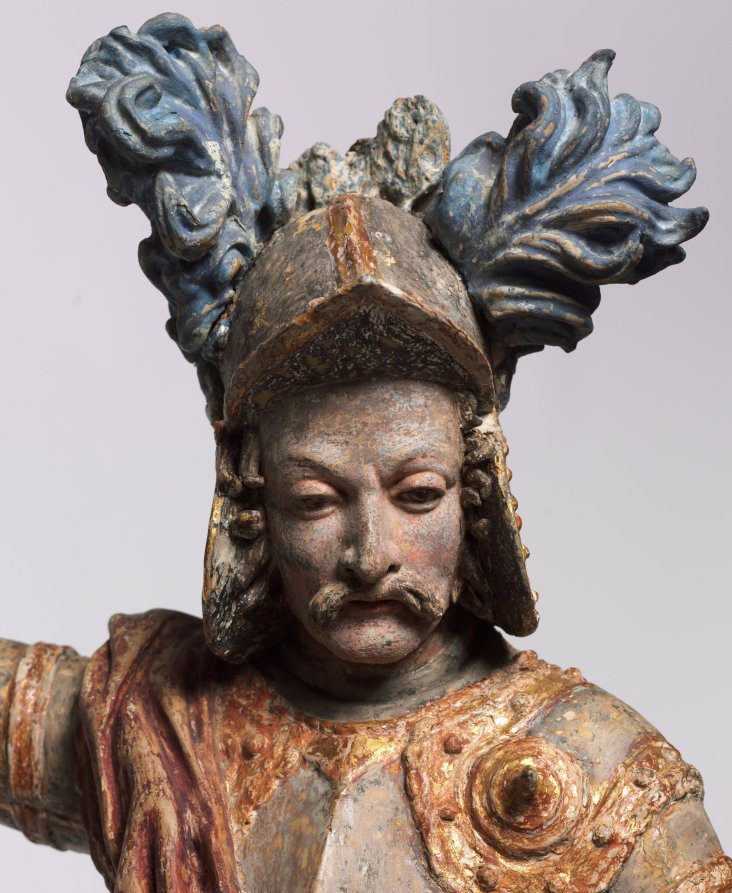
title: Saint George and the Dragon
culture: South Germany or Austria, late 17th century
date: late 1600s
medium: painted and gilded wood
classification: Sculpture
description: Saint George, a Roman soldier martyred for his Christian faith, is best known for slaying a fearsome dragon that terrorized the city of Silene, in Libya. George offered to kill the monster if residents of the city convert to Christianity. Here, George stands triumphantly over the dragon, writhing as it dies. The artist deliberately incorporated features intended to make his figure seem more familiar: the dragon seems more canine than reptilian, while George wears armor from the recent past and bears almost portrait-like facial features.